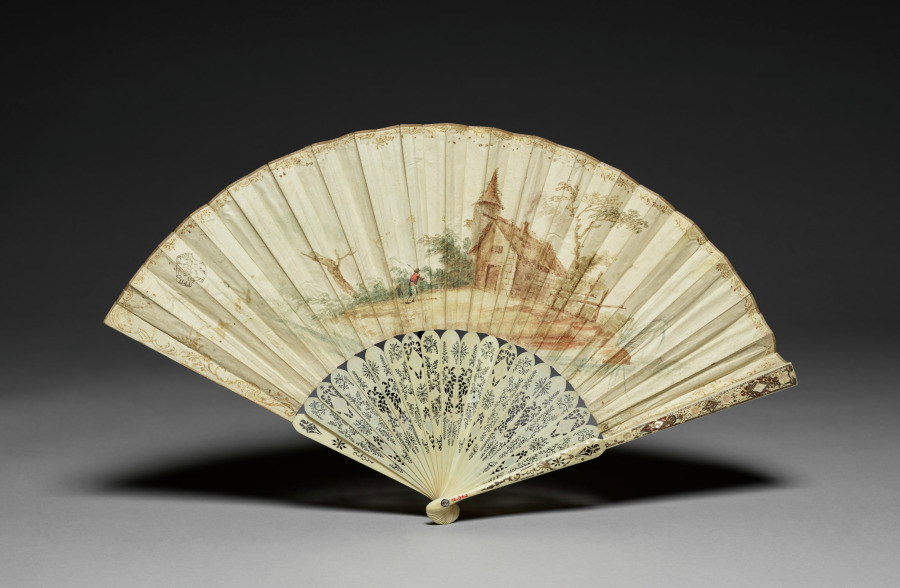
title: Folding Fan: Landscape with Ancient Ruins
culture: France(?)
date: c. 1790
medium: leaf: gouache on skin; frame: pierced ivory with metal and mother-of-pearl inlays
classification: Miscellaneous